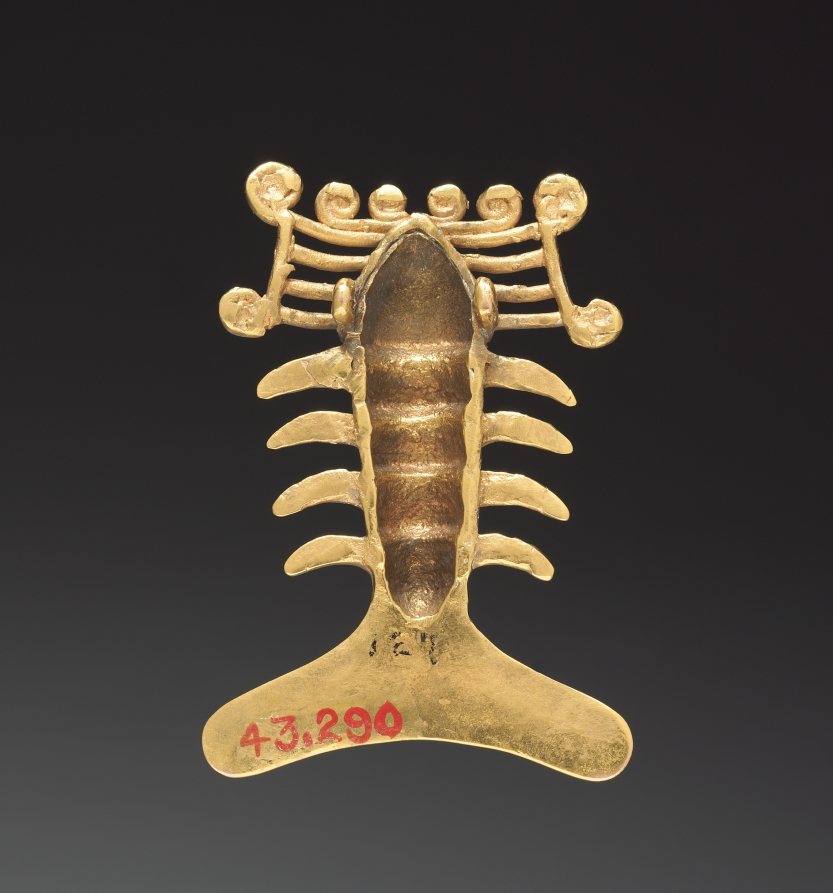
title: Lobster Pendant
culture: Costa Rica, Diquís region, 11th-16th century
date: c. 1000–1500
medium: cast gold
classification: Metalwork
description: Among the pendants shown here are a crustacean (1943.290), an animal-headed figure (1948.18), and two pendants featuring birds (1951.442 and 1946.223). The latter were dubbed aguilas (eagles) by Christopher Columbus, who saw natives wearing them as necklace ornaments. Modern researchers are not as sure of the species shown, but some believe that they are birds of prey because talons and beaks are prominent and often clutch something, in one example here a small, disembodied head that holds a clapper. In both examples, two tufts in the form of crocodiles in profile flank the birds’ heads.